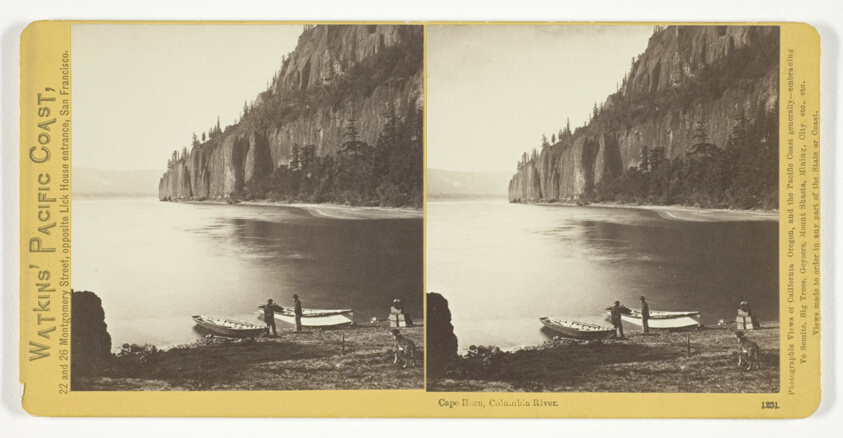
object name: Photograph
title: Cape Horn, Columbia River, No. 1231 from the series "Watkins' Pacific Coast"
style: 19th century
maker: Carleton E. Watkins; American, 1829-1916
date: 1867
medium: Albumen print, stereo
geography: United States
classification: stereograph (albumen); albumen silver print; photographic process; photography; photograph